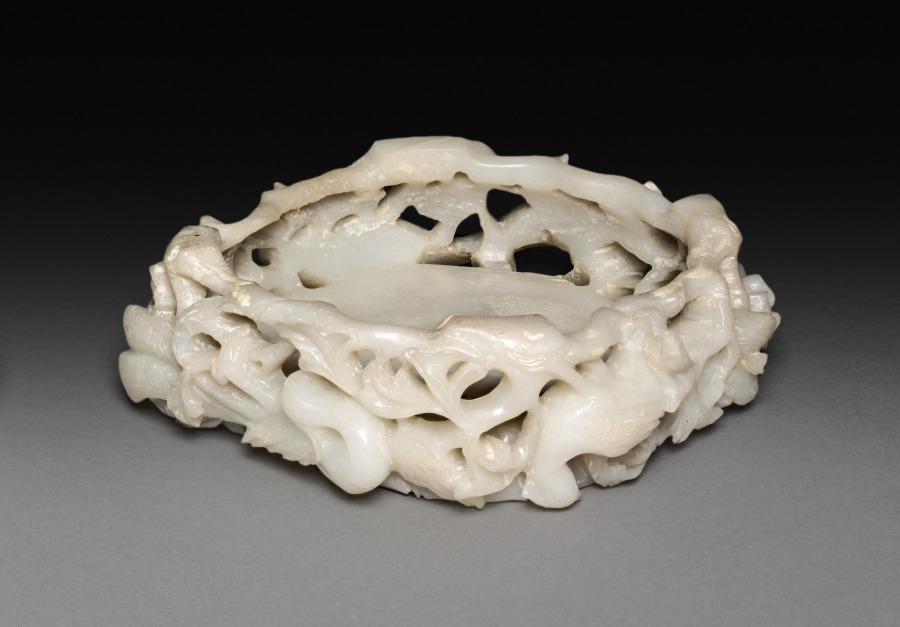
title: Three-Sectional Altar Group: Koro (bottom section of base)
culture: China, Qing dynasty (1644-1911)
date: 1644–1911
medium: jade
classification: Jade